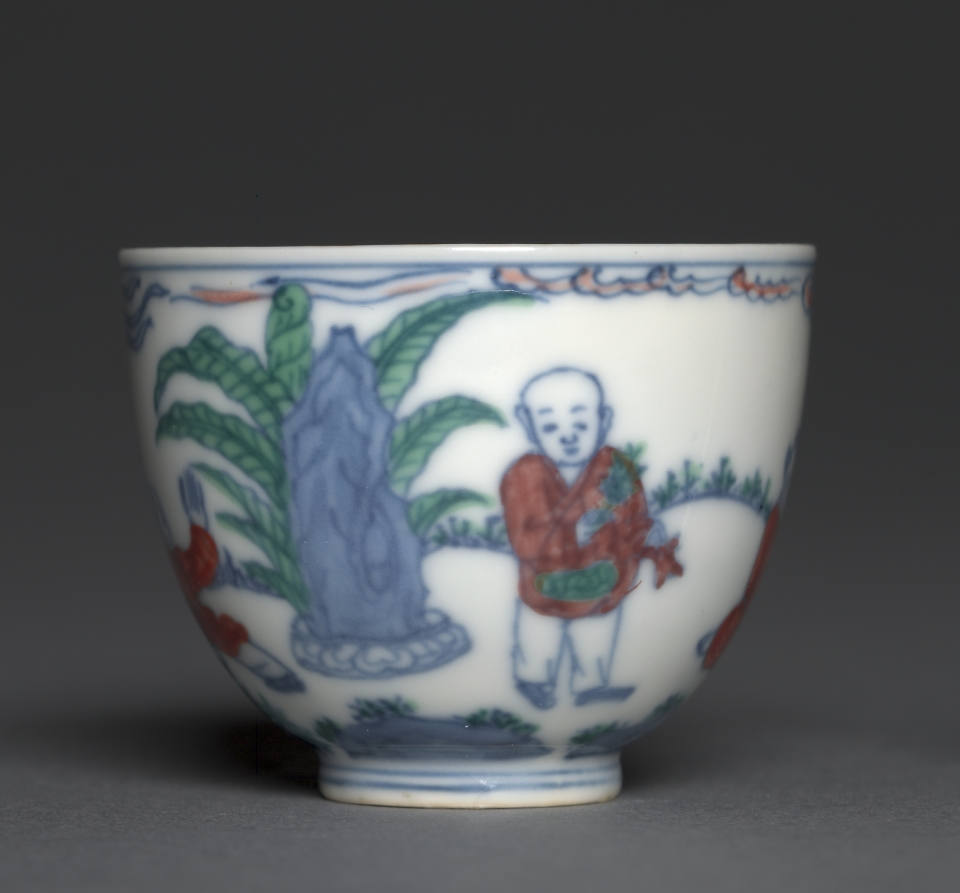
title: Wine Cup with Children at Play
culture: China, Jiangxi province, Jingdezhen, Ming dynasty (1368-1644), Chenghua mark and period (1465-1487)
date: 1465–87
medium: porcelain with underglaze blue and overglaze enamel decoration, docai ("joined colors") ware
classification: Ceramic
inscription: 大明成化年製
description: This delicate wine cup, only two inches high, exhibits free, spontaneous drawing as well as perfect compositional balance over its small surface area. The motifs were outlined with cobalt blue; the piece was then glazed and fired in the normal way for making the blue-and-white ware. After firing, the outline painting was completed with colored enamels over the glaze. The piece was fired the second time. The pictorial decoration is refined and complicated; the porcelain body is of exceptionally high quality and is thin, translucent, and light in weight.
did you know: Chenghua ware demonstrates one of the high points of technological accomplishment in Chinese porcelain production.